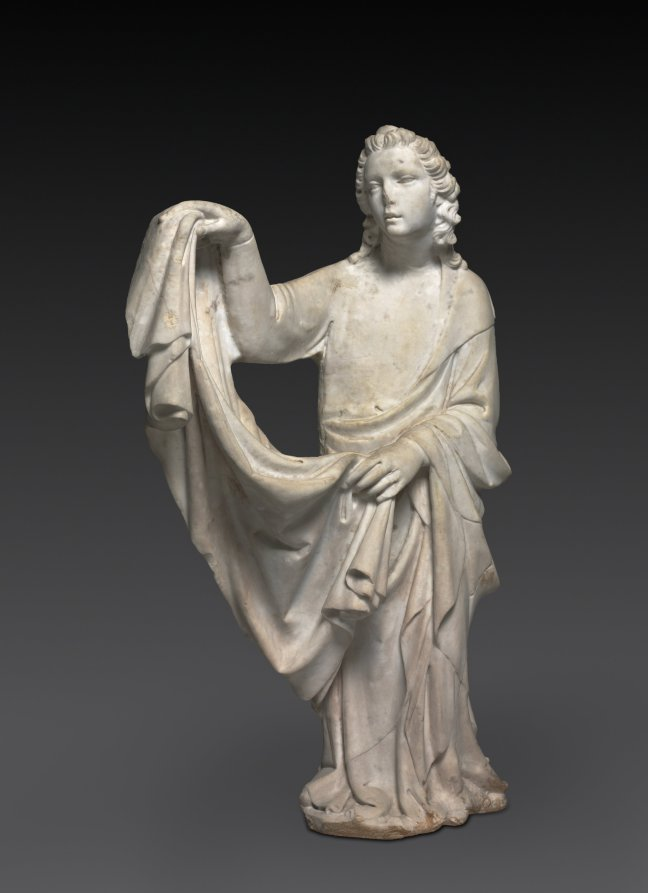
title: Angel from a Tomb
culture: Italy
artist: workshop of Tino di Camaino (Italian, c. 1285–1337)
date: 1330–50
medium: marble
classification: Sculpture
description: Tino da Camaino was active in Siena, Pisa, and Florence after 1311 where he established his reputation as an important and gifted sculptor. In 1323 he was summoned to the Angevin court at Naples, probably by King Robert of Anjou to work on the sepulchral monument of the king's daughter-in-law, Catherine of Austria. During the remainder of his life, Tino created a remarkable series of tomb sculptures in Naples. This pair of marble angels most likely represents the work of a member of Tino's workshop produced for one of these Neapolitan tombs, either during the final years of the master's life, or else independently after Tino's death in 1337.